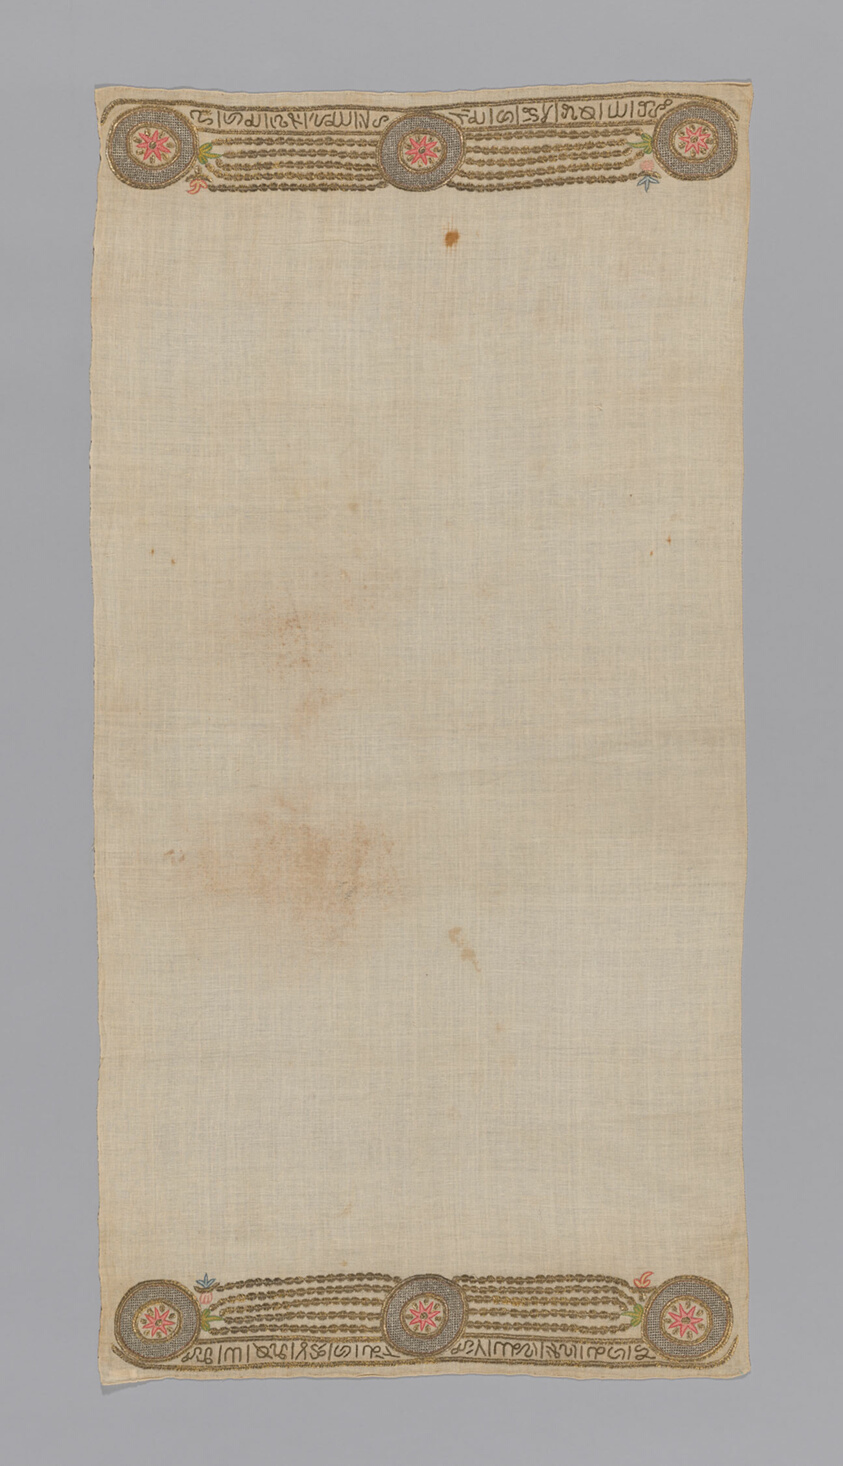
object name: Textile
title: Towel or Napkin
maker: Turkey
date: 19th century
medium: Embroidered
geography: Turkey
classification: textile; needlework (visual works); weaving